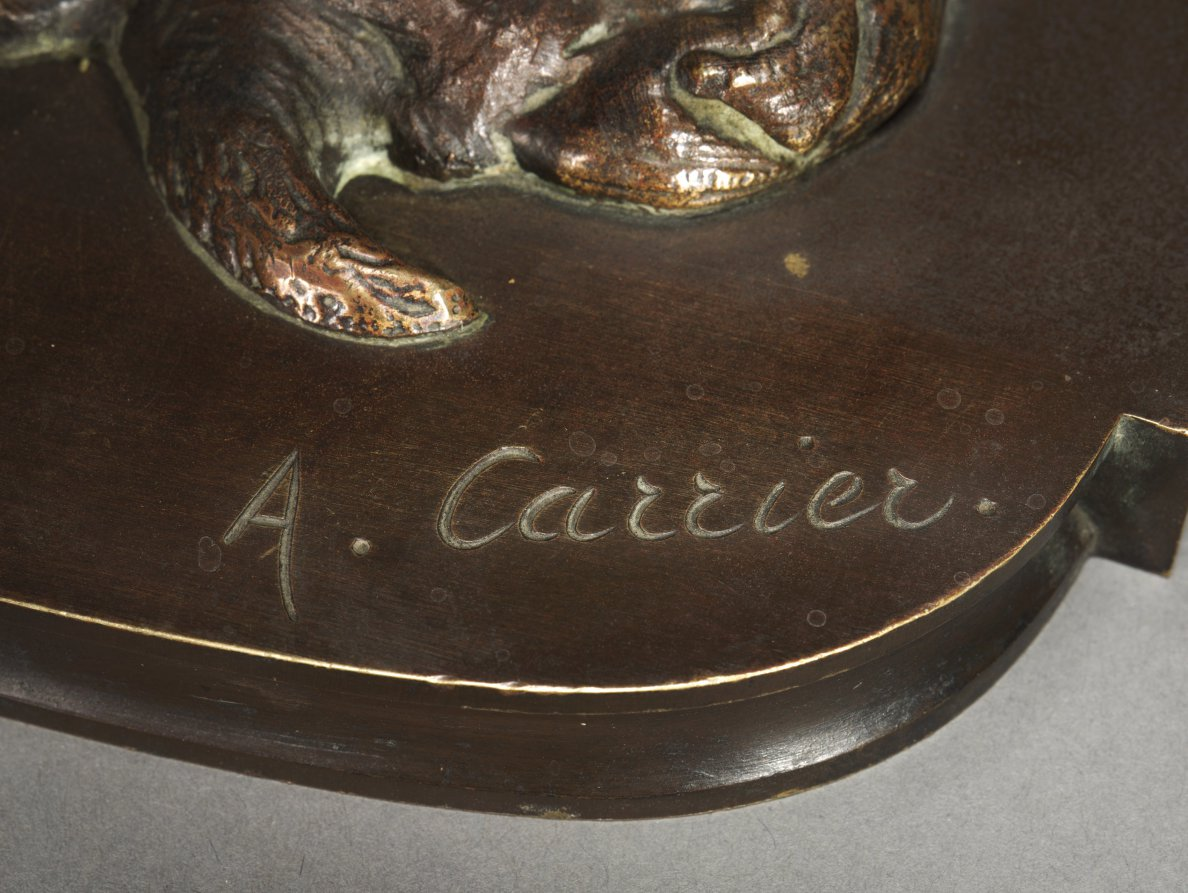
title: Orpheus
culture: France, 19th century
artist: Albert-Ernest Carrier-Belleuse (French, 1824–1887)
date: early 1860s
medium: bronze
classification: Sculpture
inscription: Signed: "A. Carrier"; inscribed: "Boyer"